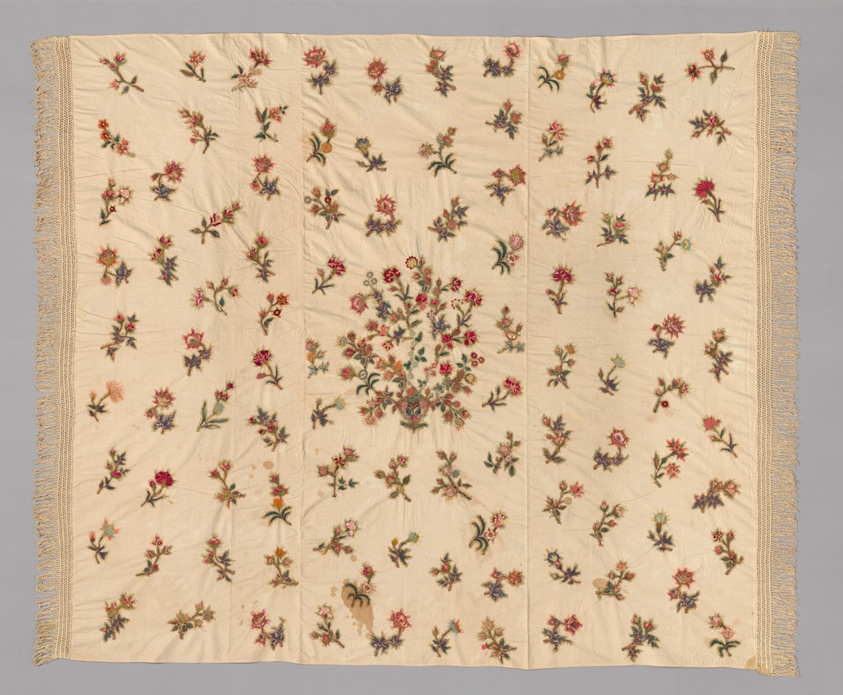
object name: Textile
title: Bedcover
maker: United States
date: 1801/25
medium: Cotton, plain weave; embroidered in wool and cotton; appliquéd with edges turned in, couching with large slanting stitches, encroaching satin stitch, black shading, fishbone, satin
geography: United States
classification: textile; needlework - quilt